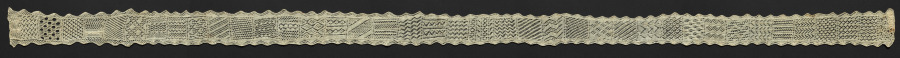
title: Knitted Lace Sampler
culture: Italy, Sienna, 19th century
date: 19th century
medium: knitted linen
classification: Sampler